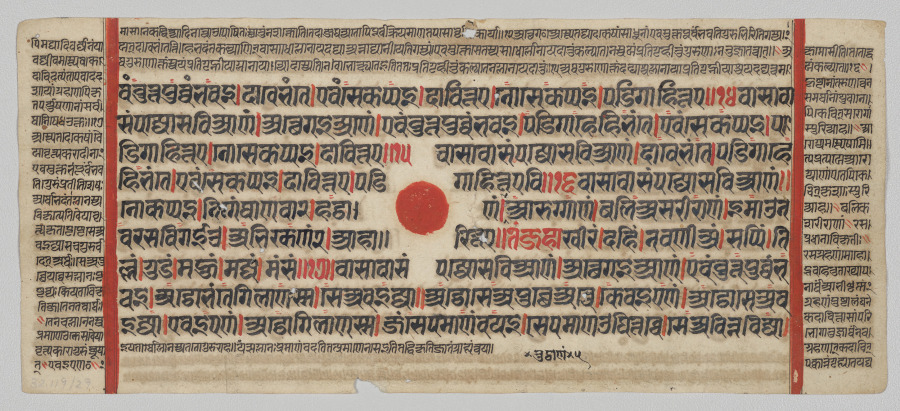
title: Text, Folio 68 (recto), from a Kalpa-sutra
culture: Western India, Gujarat, last quarter of the 15th century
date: c. 1475–1500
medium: Gum tempera, ink, and gold on paper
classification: Painting